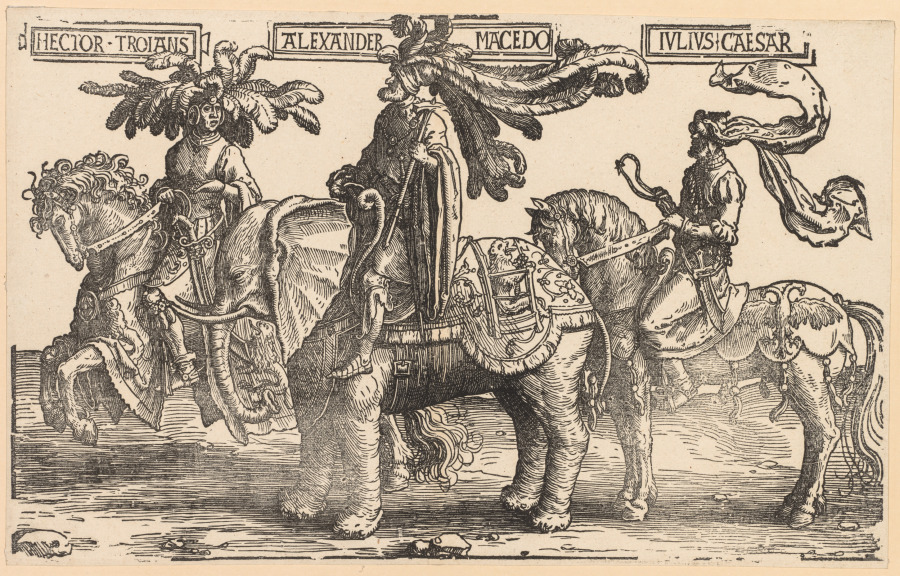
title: The Nine Heroes: Hector of Troy, Alexander of Macedon, Julius Caesar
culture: Netherlands, 16th century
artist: Lucas van Leyden (Netherlandish, 1494–about 1533)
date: 1515–1517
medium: woodcut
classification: Print